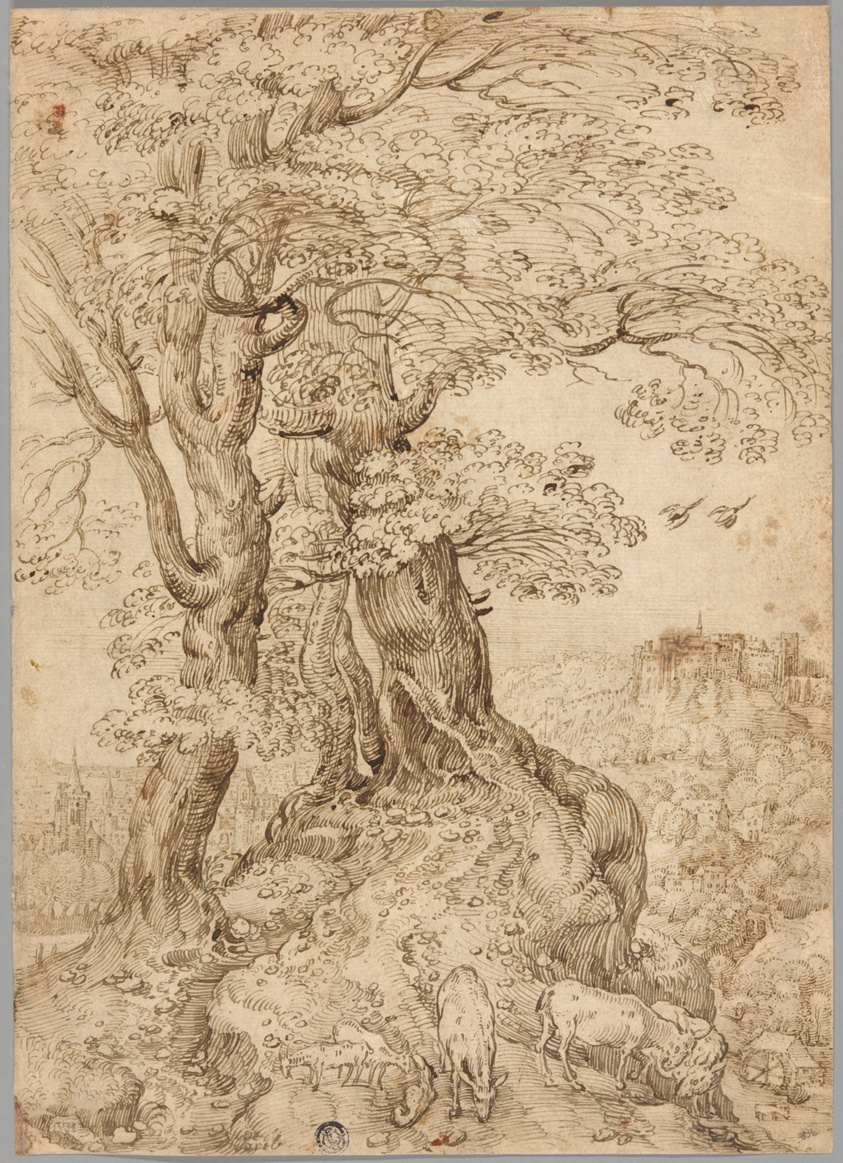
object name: Drawing and Watercolor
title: Wooded Landscape with Donkeys and Goats, and Castle on Hill in Distance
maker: After Pieter Bruegel, the elder; Flemish, 1525/30-1569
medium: Pen and brown ink on cream laid paper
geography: Flanders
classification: pen and ink drawings; drawings (visual works); prints and drawing